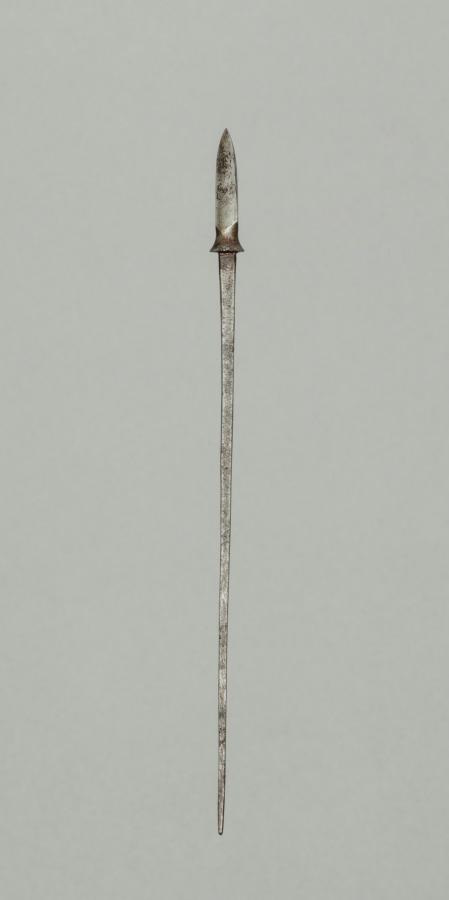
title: Arrow Point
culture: Japan, Edo period (1615–1868)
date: 1600s-1700s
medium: steel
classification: Arms and Armor